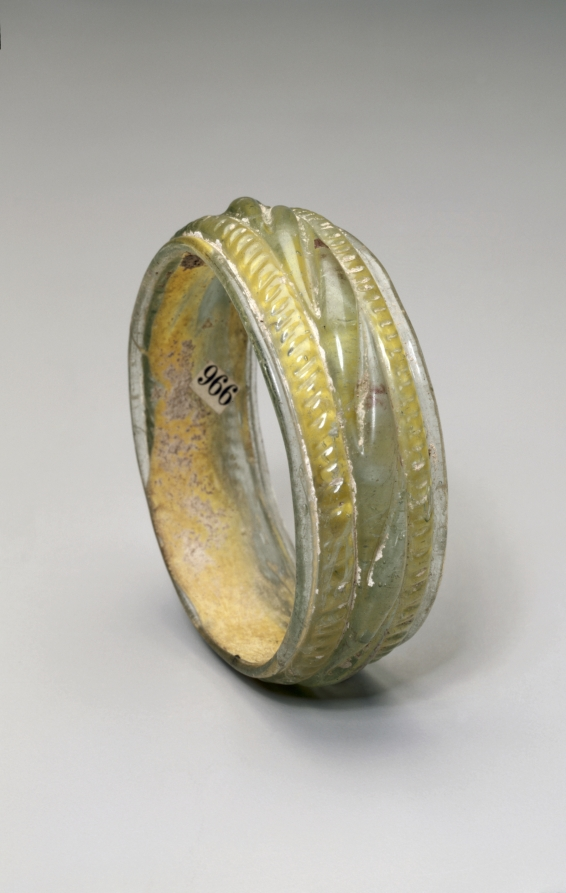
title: Bracelet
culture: Cyprus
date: 100–300 CE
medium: glass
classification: Jewelry